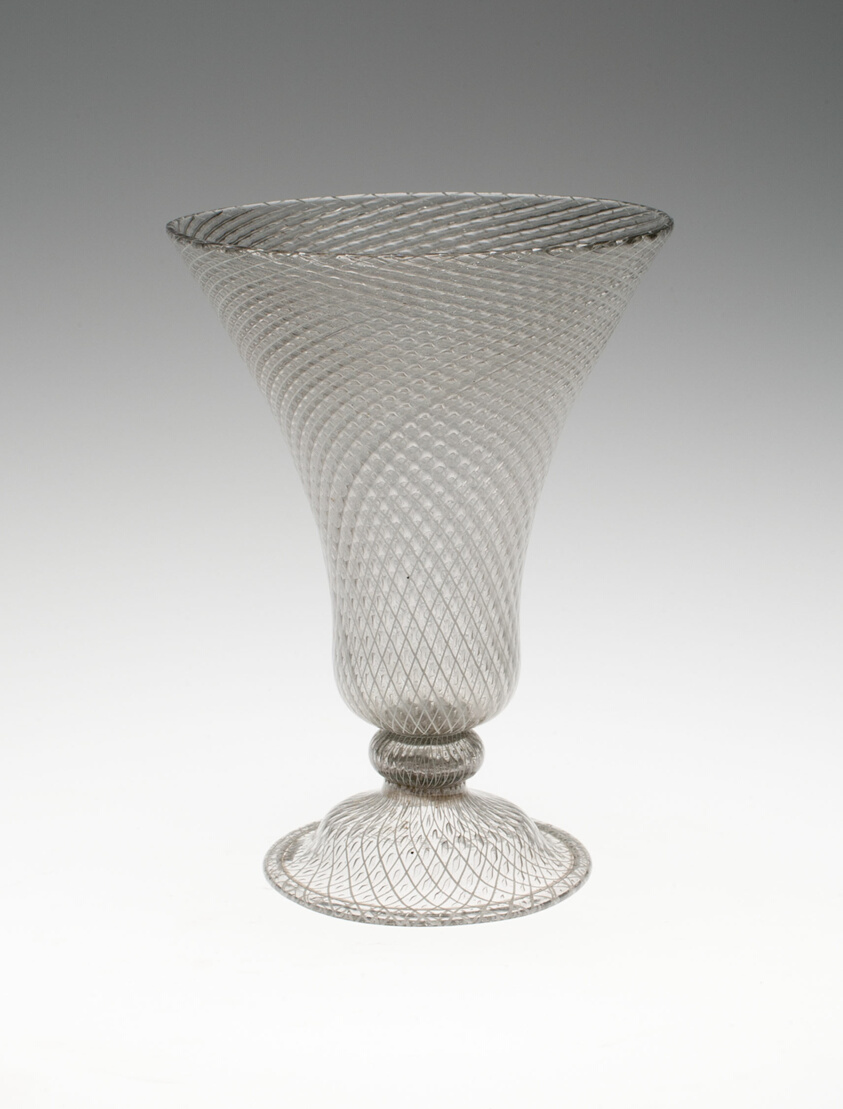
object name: Glass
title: Goblet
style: Renaissance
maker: Italian; Venice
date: c. 1600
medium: Glass (vetro a reticello)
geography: Venice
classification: goblet; drinking vessel; glass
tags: drinking, goblet, wine